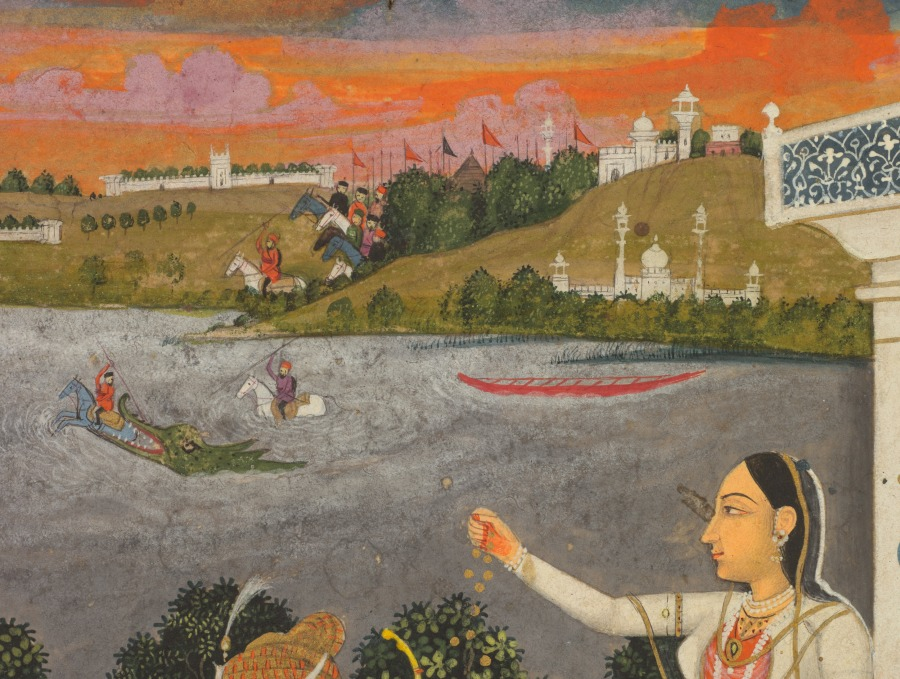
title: A blindfolded suitor is brought before a princess (recto)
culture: India, Lucknow, Mughal, 18th century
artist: Fayzullah (Indian, active c. 1730–1765)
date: 1755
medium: Gum tempera and gold on paper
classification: Painting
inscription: signed in two places: on capital of central pillar: 'amal - i Fayzullah ("the workof Fayzullah"), and below: bi - qalam i Fayzullah Musavvir walad - i Faqirullah Musavvir dar sanna 1755 ("by the pen of Fayazullah the painter son of Faqirullah the painter in the the year 1755")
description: In a scene set on a carpeted terrace in the women’s palace quarters, an older woman of the harem drags a young prince with a white blindfold over his eyes before a princess grasping a document. Such a scene evokes a literary allusion of a princess who selects her suitor, but it also resonates with circumstances at the Mughal court. Signed and dated by the artist, this painting was completed at a time when powerful women wielded control over the emperor, and Ahmad Shah Bahadur (reigned 1748–54), son and successor of Muhammad Shah, had been blinded and deposed less than one year before.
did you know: A gigantic crocodile swallows a horse and rider attempting to cross the river.